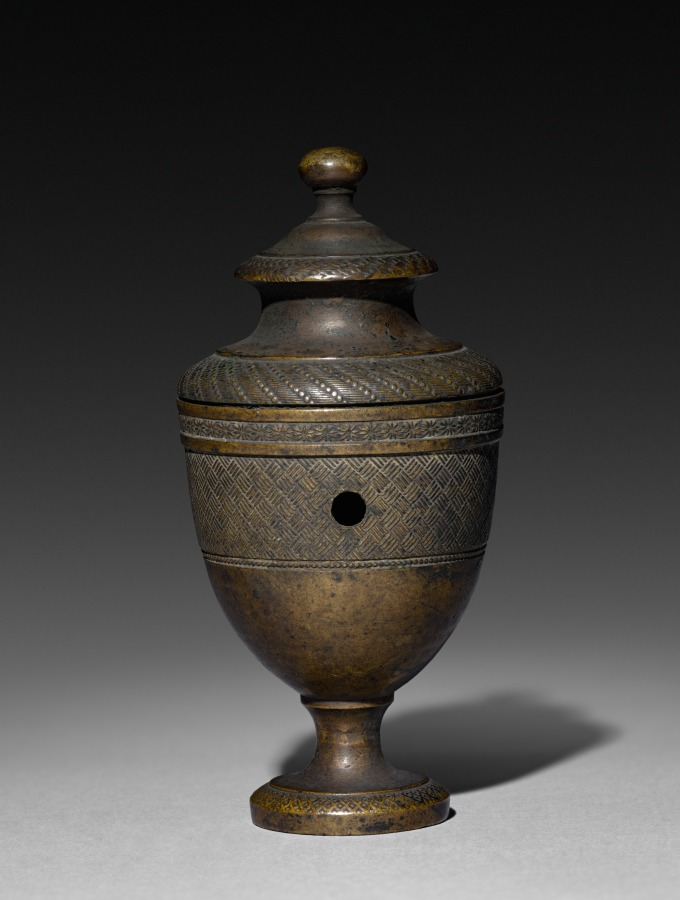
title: Ornamental Finial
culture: France, late 18th century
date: late 1700s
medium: bronze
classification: Metalwork